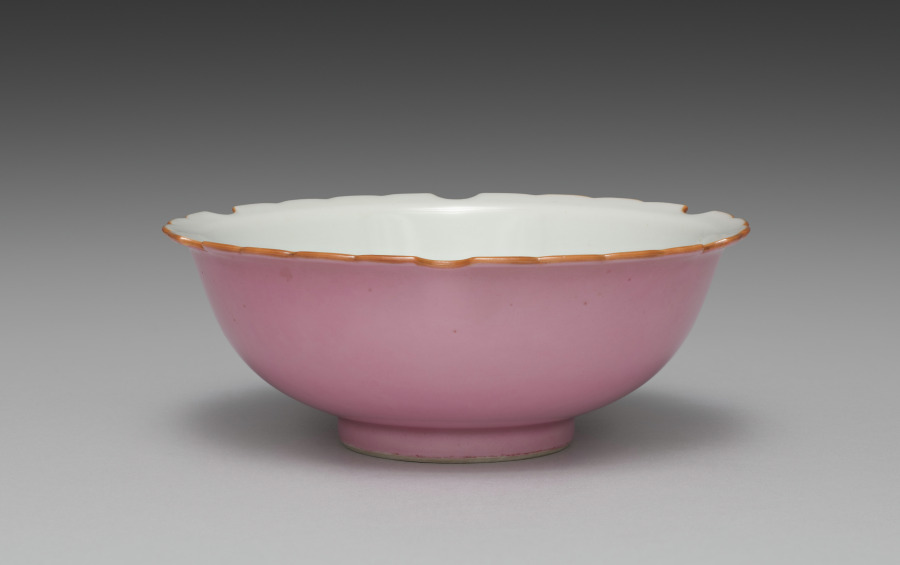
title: Dish from Snow-Flake Side Dishes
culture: Japan, Meiji period (1868–1912)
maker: Seifū Yohei III (Japanese, 1851–1914)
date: 1893–1914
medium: One from a set of six porcelain dishes; porcelain with lobed rims and pink glaze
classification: Ceramic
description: According to the box lid, this set of 6 side dishes, or mukōzuke, are “snow-flower style” (sekkashiki), having mouths shaped like snowflakes. Their mouths, which have 6 lobes and scalloped edges, are traced with brown iron oxide at the rim. The outside of each bowl is glazed with a very bright pink over the basin and foot, and the inside is left white. From directly above, one sees a snowflake-like shape, and from the side, they seem to float above a rosy ground.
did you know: The box for this set of dishes has an inscription on the side noting that they were for a person with the family name Nakamoto.